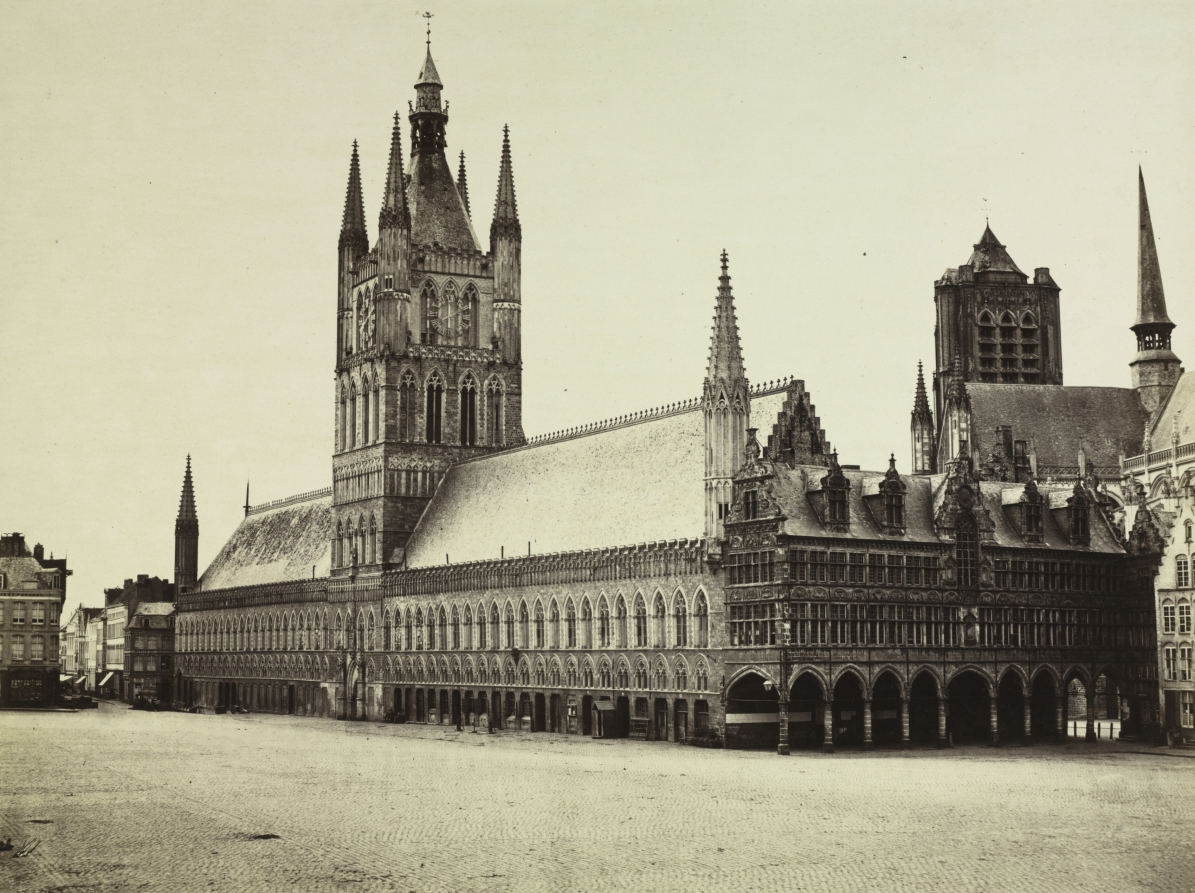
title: Ypres, Belgium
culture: France, 19th century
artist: and Auguste-Rosalie Bisson (French, 1826–1900)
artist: Louis-Auguste Bisson (French, 1814–1876)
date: c. 1855–1862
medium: albumen print from wet collodion negative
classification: Photograph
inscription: Written in pencil on recto of mount: "Ypres (Belgium)"; "27"; "10 [circled]"